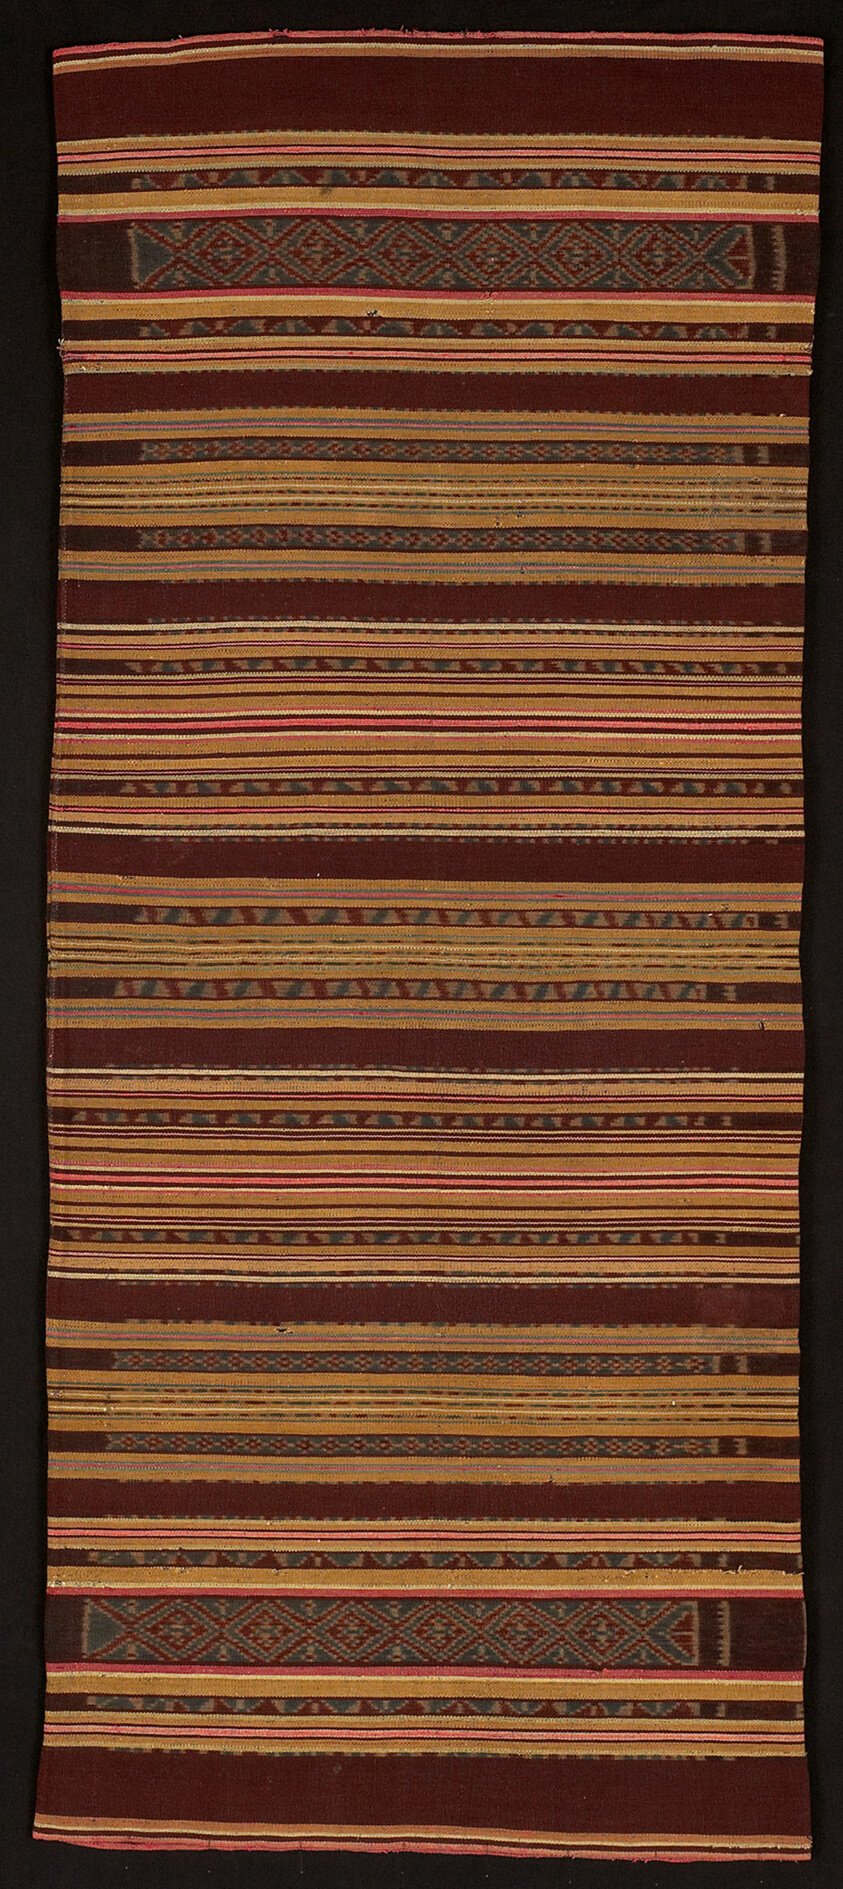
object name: Costume and Accessories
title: Woman's Skirt (Sarong)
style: indonesian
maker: Indonesia, Flores, possibly Adonara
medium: Two panels joined: stripes of cotton and silk, warp resist dyed (warp ikat) plain weave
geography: Indonesia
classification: textile; weaving; weaving - printed; costume